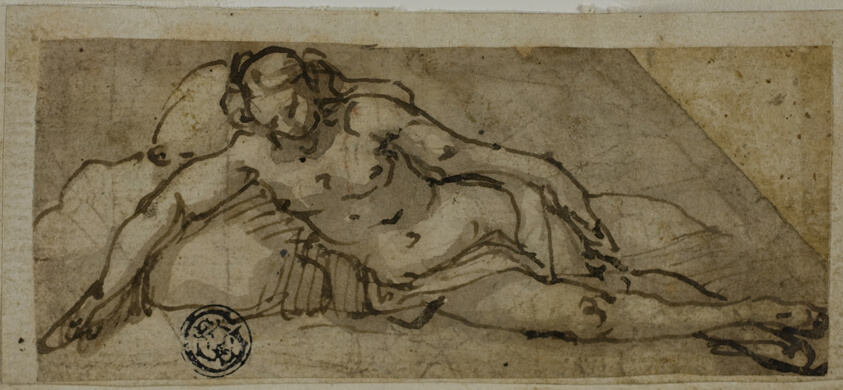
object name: Drawing and Watercolor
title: Reclining Female Nude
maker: Attributed to Lazzaro Tavarone; Italian, 1556-1641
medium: Pen and brown ink with brush and brown wash, on ivory laid paper, laid down on ivory laid paper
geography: Italy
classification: ink with wash; drawings (visual works); prints and drawing